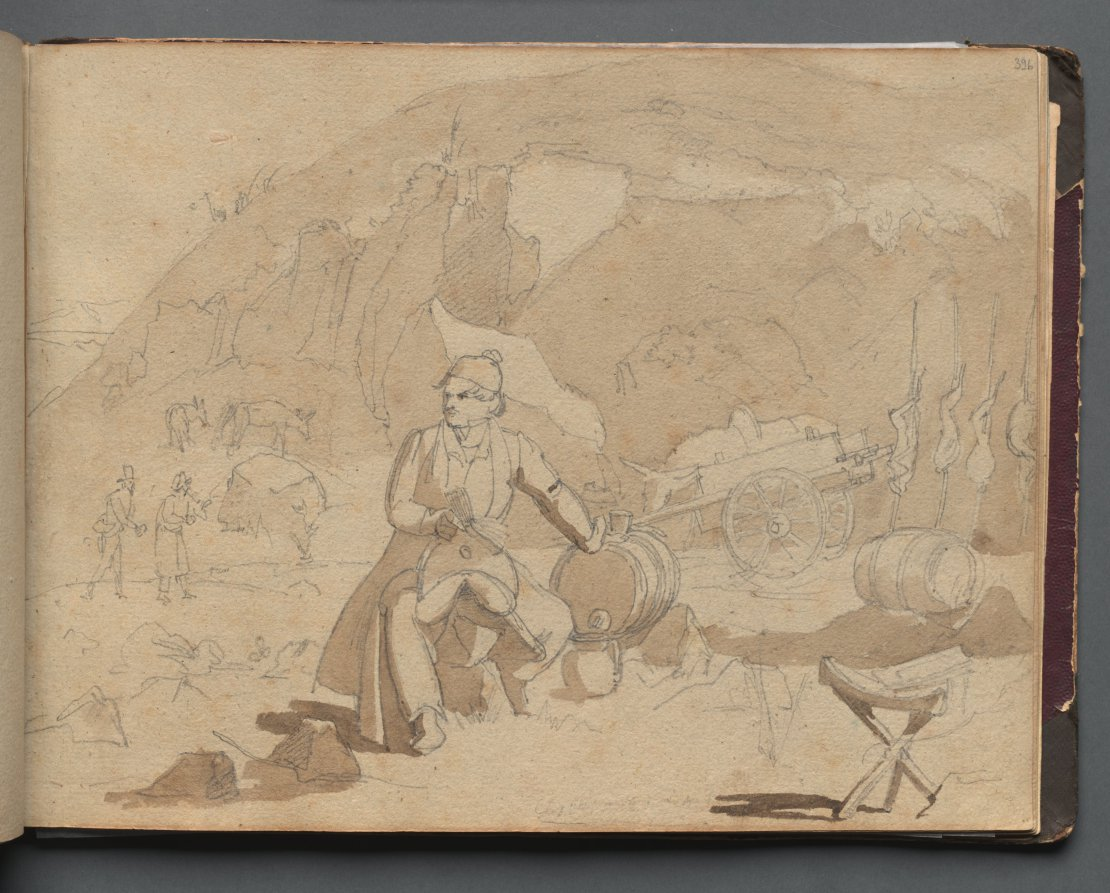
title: Album with Views of Rome and Surroundings, Landscape Studies, page 39a: Figure in a Landscape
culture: Germany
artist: Franz Johann Heinrich Nadorp (German, 1794–1876)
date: c. 1830s-70s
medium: graphite with brown wash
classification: Bound Volume